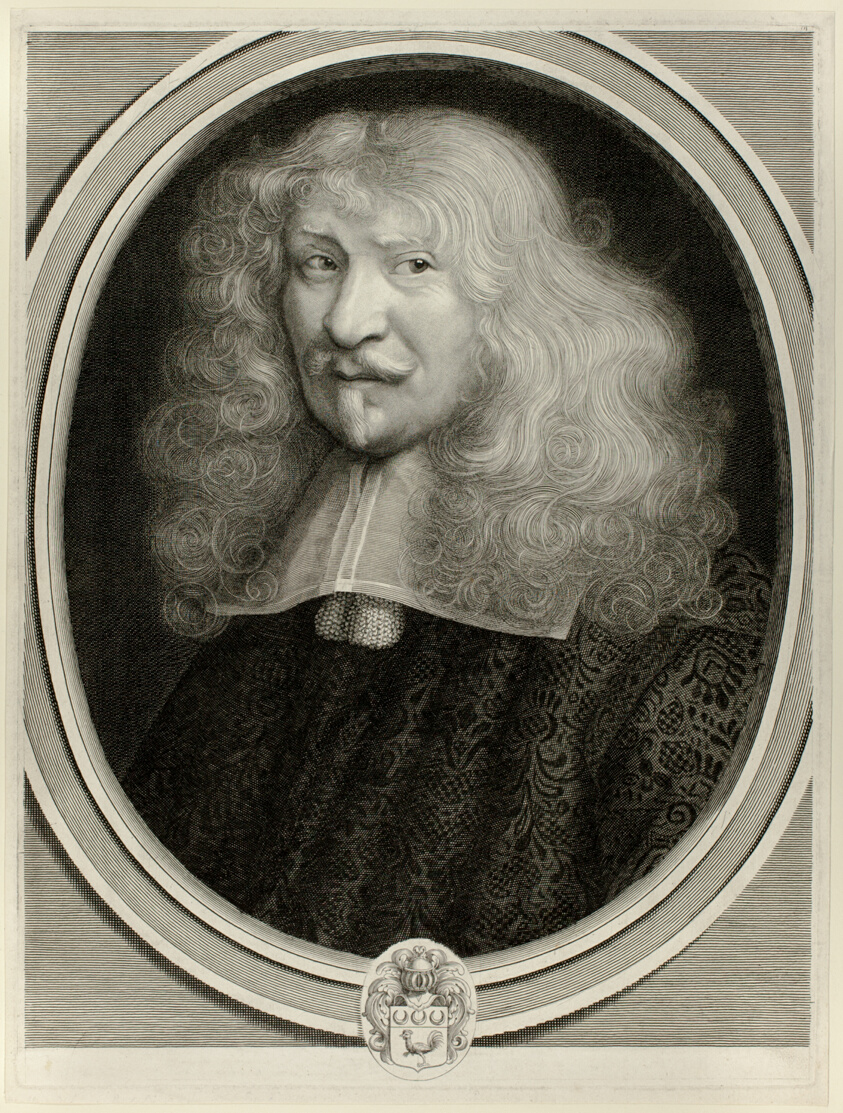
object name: Print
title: Denis Marin de la Châtaigneraye, Secretary to the King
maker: Antoine Masson (French, 1636-1700)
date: 1672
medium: Engraving in black on cream laid paper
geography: France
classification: engraving; print; prints and drawing